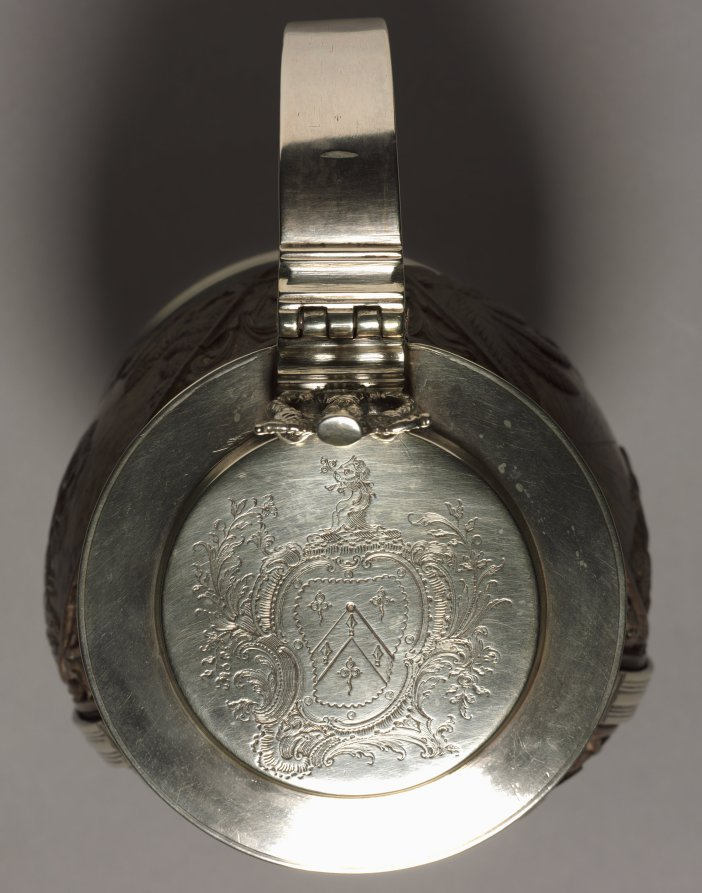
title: Coconut Cup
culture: carved coconut, probably The Netherlands; silver mount, probably England, 17th century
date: c. 1630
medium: carved coconut in silver mount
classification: Metalwork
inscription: top lid has engraved coat-of-arms, underside of lid has inscription: George Lewis TIVERTON Feby, 1st 1760.